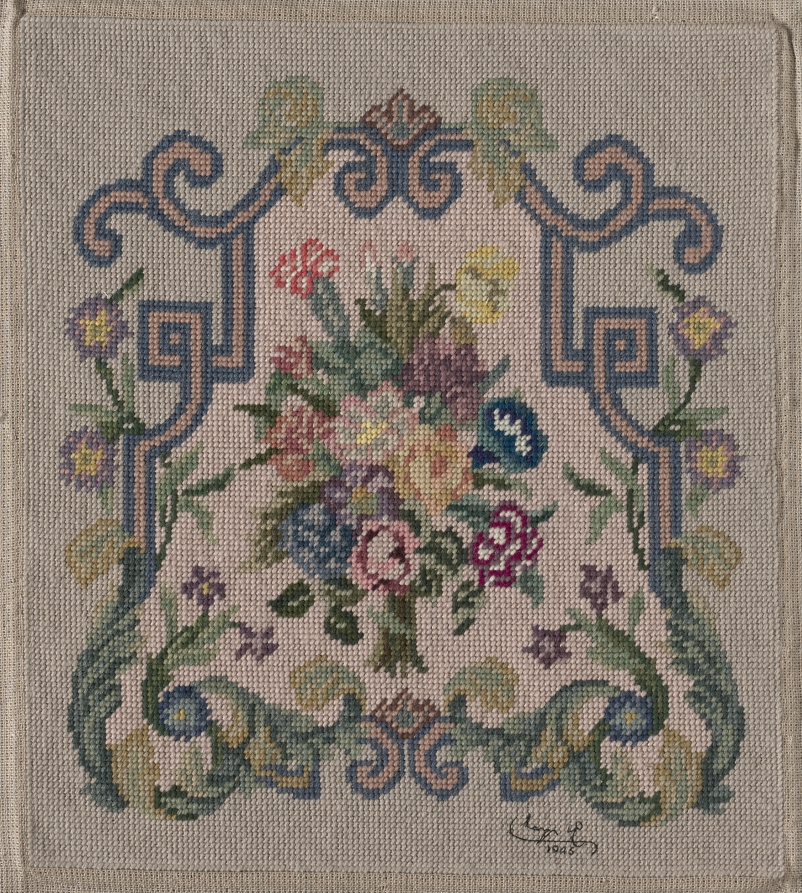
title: Embroidered Floral Panel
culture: England, 20th century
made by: Queen Mary (British, 1867–1953)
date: 1945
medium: embroidery; wool on cotton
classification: Embroidery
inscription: signed lower right corner: "Mary R 1945."